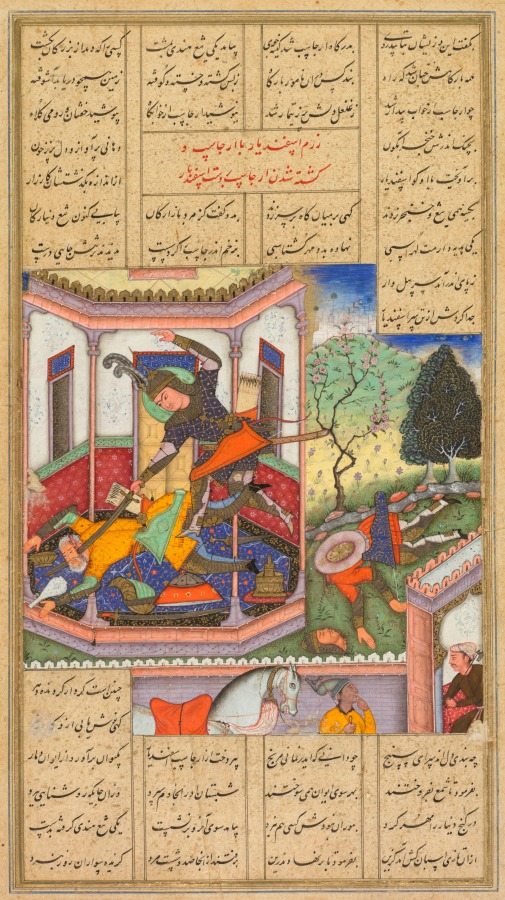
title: Isfandiyar slays Arjasp, the king of Turan, from a Shah-nama (Book of Kings) of Firdausi (Persian, about 934–1020)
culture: Mughal India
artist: Haidar Kashmiri (Indian, active late 1500s-early 1600s)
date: 1600–1605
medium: Gum tempera, ink, and gold on paper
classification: Painting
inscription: Persian inscription in left margin, in nasta‘liq script: 25 / Haidar Kashmiri; Persian title in nasta‘liq script: The Battle of Isfandiyar with Arjasp and The killing of Arjasp by the hand of Isfandiyar; Persian text in nasta‘liq script: He uttered these words, and hurried away from them Toward Arjasp’s court, bent on revenge He went forth, grasping a blade of Indian steel, Whomever of the notables his eyes fell on, was killed on the way So that in passing through the royal hall Hard it was to pick one’s way: So many wounded, battered, and dead Had turned the ground into a turbulent sea. When Arjasp awoke from his sleep His heart was troubled on hearing the din That he could not make out in the bedchamber. He put on his mail shirt and Roman-fashioned helmet Clutching in hand a burnished dagger, He shouted loud, blood coursing through his heart. The warrior Isfandiyar confronted him. They fought beyond measure and scale, Exchanging daggers and swords in a furious feud At times targeting the head, at times the waist, To him he (Isfandiyar) said, “Now from the tradesman Will you receive the gift of a blade, one glittering like a silver denarius. I have it as a gift for you, worthy enough to come from Luhrasp, inlaid with Gushtasp’s seal. He made Arjasp go limp and lifeless by the delivered cuts Nowhere on his body did he leave untouched. His mammoth body toppled over His head severed from the body by Isfandiyar. Such is the conduct of the revolving fortune: At times it offers us a honeyed potion, at others a deadly poison Why tie your heart to this transient place Since you know that you will not stay forever, do not grieve and pine. Having dealt with Arjasp, Isfandiyar Gutted the palace, its smoke reaching as far as Saturn He ordered torches lit Setting fire to the palace from all sides He entrusted his (Arjasp’s) women’s quarters to a eunuch, Taking all luster away from the place. He sealed off the treasury No one in Turan was now equal to his fight. He went to the stables and mounted A blade of Indian steel in his hand He selected among the Arab horses there And ordered them saddled A hundred and sixty men rode away from there Handpicked riders for the day of battle.; Verso: Text of Isfandiyar slays Arjasp, the king of Turan: Persian inscription in bottom margin, in nasta‘liq script: The army realized Persian text in nasta‘liq script: [cont. from recto] He furnished mounts, moreover, for his sisters, And marched forth from the court-gate of Arjasp, But left a few Iranians, men of name, With noble Sawa in the hold. “When we,” He said, “have gone outside the walls, I and my noble warriors, to the plain, Secure the gate against the Turkman troops, And may my good star aid me. When ye think That I have joined our noble troops outside, Then—let the watchmen from the lookout cry: ‘Blessed be the head and crown of Shah Gushtasp.’ And when the Turkman troops come toward the hold, In flight retreating from the battlefield, Then you shall throw the head of King Arjasp Before them from the tower of the watch.” The valiant hero rushed upon the plain, And slaughtered all the Turkmans that he found. As he approached the troops of Bishutan They saw and praised him in amazement that he, Who was so young, should show such bravery. When the moon had left her silver throne, And when three watches of the night had passed, The watchman shouted lustily, proclaiming: “Gushtasp, the Shah, has gained the victory, And may Isfandiyar be ever young. May heaven, moon, and fortune be his helpers, Who has in vengeance for Luhrasp beheaded Arjasp and, adding luster to our Grace And customs, cast him down from throne to dust, And made the name and fortune of Gushtasp Resplendent.” Hearing such a cry the Turkmans All listened while Kuhram grew dark of heart By reason of that watchman, was astonished, And spoke thus to Andariman: “How clear This cry is in the night! What do you say Can be the cause? Let us consult, for who Would dare to bawl thus by the monarch’s couch And after dark? What tricks might such a one Play in the day of battle, and thus bring Our nobles into straits! So send and have His head cut off, whoever he may be. If one of our own household is our foe, And he is backing up our enemies. “With evil words and evil presages, Then will we brain him with an evil mace.” Now when the cry went on persistently Kuhram was stricken to the heart with anger Against the watchman whose utterance, spread abroad In such a fashion, filled the nobles’ ears. The soldiers said: “The shouts increase, beyond A watchman’s! Let us drive the foemen forth And after take this host” Kuhram, who was straitened At heart about that watchman, writhed and frowned. He told the troops: “These men have filled my heart With dread about the king. We must return At once, past question. What may happen after I know not.” So that night they left the field, Where Isfandiyar, with ox-head mace And wearing mail, pursued them. When Kuhram had reached The portal of the hold, and saw the Iranians Pursuing, “What is left us,” he exclaimed: “But to fight with brave Isfandiyar? Unsheathe and send your message by the sword.” But fortune frowned and those famed chiefs fared ill. The two hosts raged and smote each other's heads Till morning came, and then the chiefs of Chin Had had their day. Ascending to the ramparts The warriors of Isfandiyar inside The hold flung down therefrom the severed head Of brave Arjasp—the king that had slain Luhrasp. The Turkmans fought no longer; from their host Arose a cry, and all the troops unhelmed. The two sons of Arjasp wept and were consumed As in a fierce fire, while all the army knew What they must weep for on that evil day. (closely adapted from Warner and Warner 1912, 152)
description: This illustrated scene occurs early in the narrative of Isfandiyar, who is destined to serve as king of Iran with Rustam as his champion. The episode describes Isfandiyar’s quest for vengeance against the tyrant Arjasp of Turan, who had defeated his father in battle and taken his sisters captive. Isfandiyar disguised himself as a merchant, entered Arjasp’s fort, and then fought his way to the enemy king, whom he defeated in battle. The artist has included beautiful and delicate details of the garden and architectural setting of this gruesome scene. An onlooker below puts his finger to his mouth in a gesture of astonishment.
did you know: Wine spilling from a porcelain bottle heightens the action of the moment.